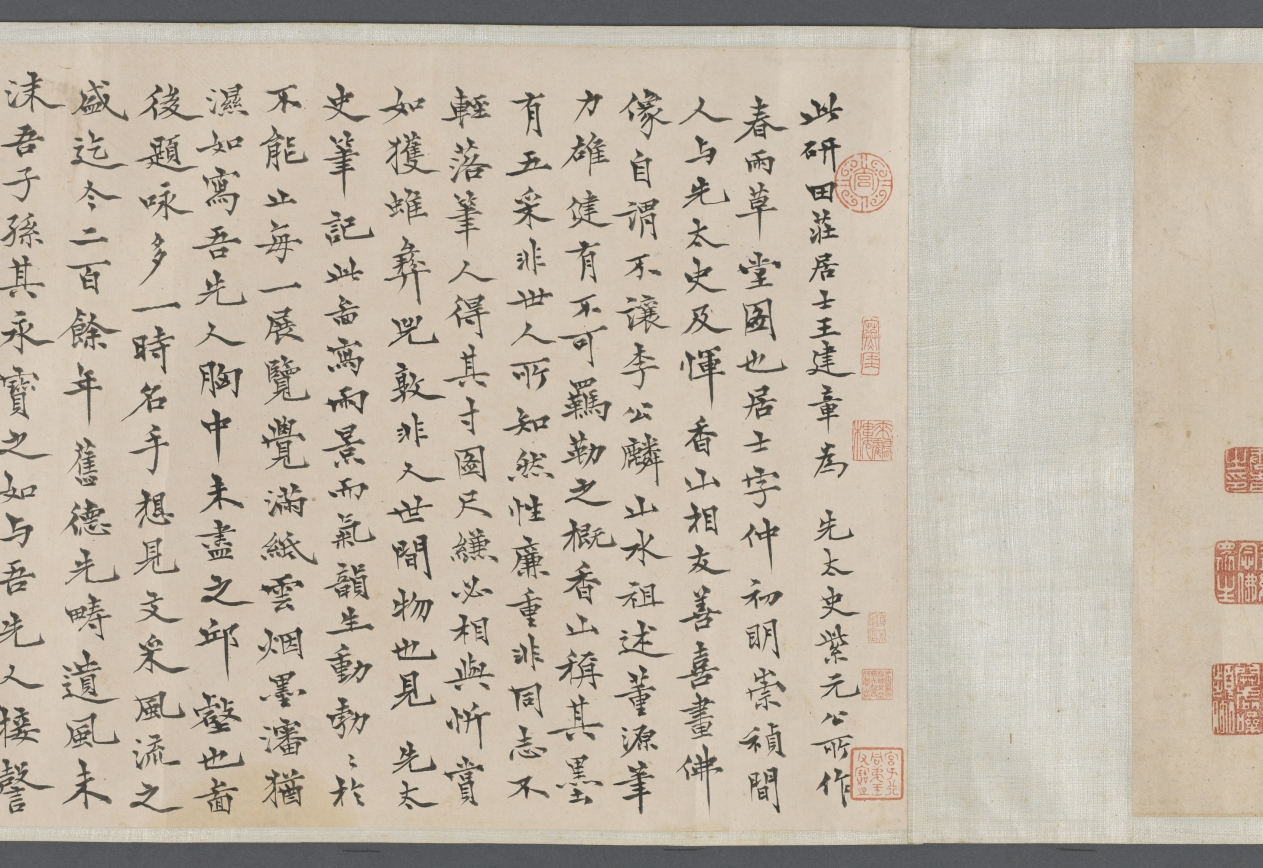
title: Spring Rain Thatched Hut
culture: China, Qing dynasty (1644-1911)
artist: Wang Jianzhang (Chinese, active 1621–1662)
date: 1650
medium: handscroll, ink on paper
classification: Drawing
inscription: Title by Wu Zhiying 吳芝瑛 (1868–1933), dated 1910.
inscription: 春雨草堂圖。庚寅仲春，為紫玄社兄畫於若耶溪上。 仲初王建章。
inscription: 12 colophons by Gong Weiliu’s 宮偉鏐 (1611–1680) contemporaries: Fang Gongqian 方拱乾 (1596–1667, jinshi of 1628); Jiang Cai 姜埰 (1607–1673); Liang Yizhang 梁以樟 (1608–1665); Du Shaokai 杜紹凱 (also named Du Jie 杜岕, 1617–after 1689), dated 1648; Zhao Kaixin 趙開心 (d. 1663), dated 1647; Zhao Erbian 趙而忭 (d. 1658); Yu Yaoguang 余耀光, dated 1649; Yao Quan 姚佺, dated 1648; Chen Taisun 陳台孫 (b. 1611, jinshi of 1640); (Monk) Shao 韶; Du Zhujin 杜祝進; and Tang Shi 唐時.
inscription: 此研田莊居士王建章為先太史紫元公所作春雨草堂圖也。居士字仲初，明崇禎間人，與先太史及惲香山相友善。喜畫佛像，自謂不讓李公麟。山水祖述董源，筆力雄健，有不可羈勒之概。香山稱其墨有五采，非世人所知。然性廉重，非同志不輕落筆，人得其寸圖尺縑，必相與忻賞，如獲蜼彝兕敦，非人世間物也！見先太史筆記，此圖寫雨景，而氣韻生動，勃勃於不能止。每一展覽，覺滿紙雲烟，墨瀋猶濕，如寫吾先人胸中未盡之邱壑也。圖後題詠，多一時名手，想見文采風流之盛。迄今二百餘年，舊德先疇，遺風未沫。吾子孫其永寶之，如與吾先人接謦咳於一堂，為感思之助，其敢作圖畫觀乎！同時香山亦有圖佚去己久，不知異日能為延津之合否。壬申長夏本昂重裝敬識。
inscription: Collectors' seals including: Gong Ben'ang 宮本昂 (1821–1874); Lian Qian 廉泉 (1868–1932); Wu Zhiying 吳芝瑛 (1868–1933)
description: With its striking simplicity, this painting captures the pure serenity of a private garden in the moist atmosphere of a spring morning on a small river. Painted in the style of Ni Zan, Wang Jianzhang dedicated this work to his patron-friend Gong Weiliu (1611-1680). Gong retired from government service after the fall of the Ming dynasty and constructed a garden-retreat at his native home in Taizhou, Jiangsu province. He invited scholars and poets from his literary society to contribute writings of his estate, which are here mounted together with the painting in this scroll.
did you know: Gong Weiliu, the owner of the estate portrayed here, had received his prestigious jinshi degree in 1643, but his official career was thwarted by the collapse of the Ming dynasty the following year.